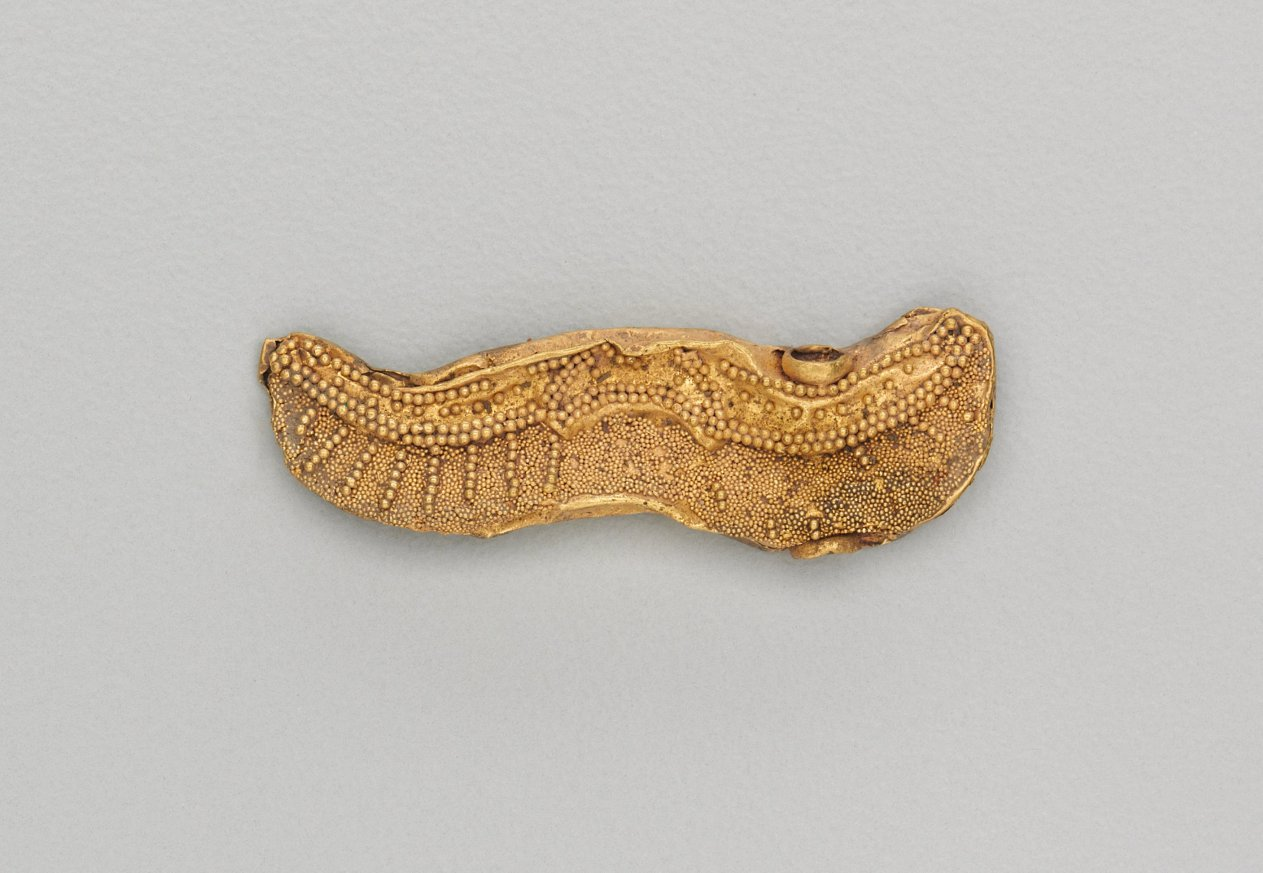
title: Set of Pendants Ending in a Bull's Head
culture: India, Shunga period (185–78 BCE)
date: 185–72 BCE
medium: gold repoussé with granulation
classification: Jewelry